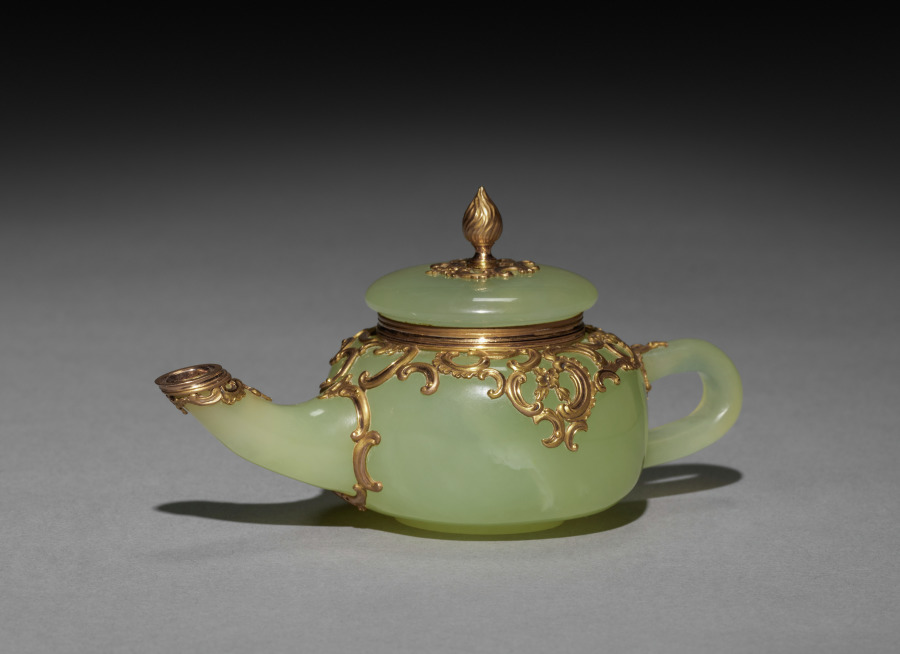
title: Miniature Teapot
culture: Russia, St. Petersburg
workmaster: Mikhail Evlampievich Perkhin (Russian, 1860–1903)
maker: House of Fabergé (Russian, 1842–1918)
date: 1886–96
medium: gold, bowenite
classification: Miscellaneous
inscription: Impressed marks: 56, crossed anchors [assay mark for St. Petersburg, 1882-96]; initials of workmaster Mikhail Perkhin (in Cyrillic); Fabergé (in Cyrillic)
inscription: Scratched: 47274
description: The House of Fabergé specialized in the creation of little treasures intended as opulent personal gifts. In creating luxurious accessories for a desk or tabletop, Fabergé often used native hardstones such as multicolored agate and quartz, green nephrite, pink rhodonite, rock crystal, and pale green bowenite found in the Ural Mountains of western Russia. Fabergé's designers often paired hardstones with gold mounts, particularly in the St. Petersburg workshop where the goldsmiths were concentrated.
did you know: Sometimes called "new jade," bowenite is actually considered a semiprecious gemstone. Though Fabergé obtained his supply from the Ural Mountains of Russia, bowenite is also the state mineral of Rhode Island.